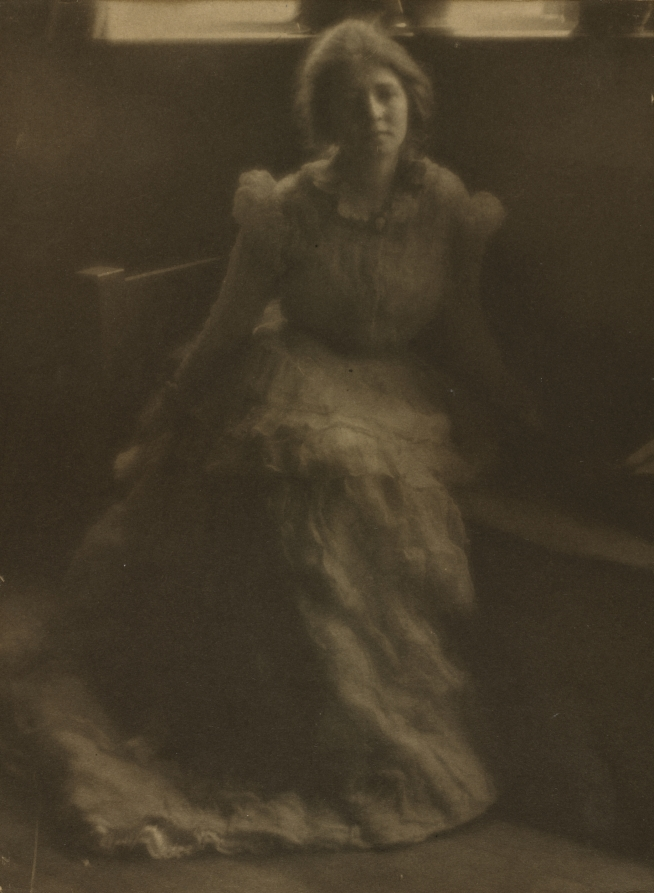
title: Julia Hall McCune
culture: America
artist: Clarence H. White (American, 1871–1925)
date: c. 1900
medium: platinum print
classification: Photograph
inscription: Written in pencil on verso: "Portrait of Julia McCune / in one of her Mother's trouseau [sic] / gowns of pale [word erased] green gauze. / about 1900"